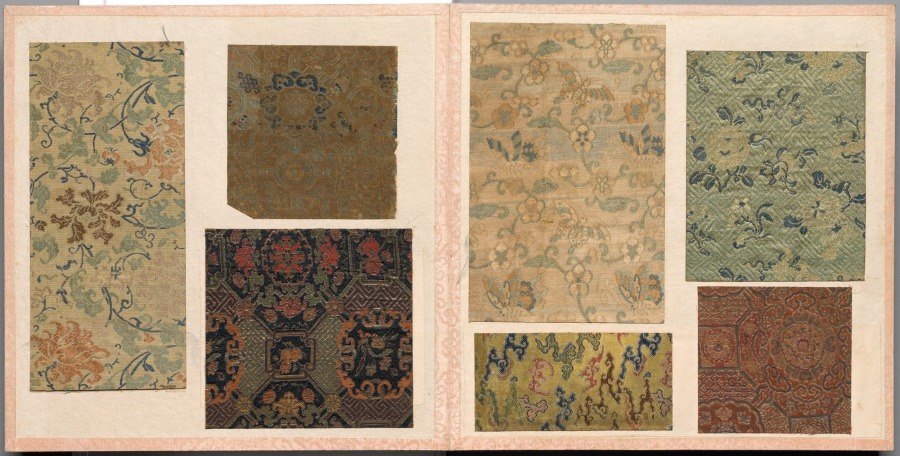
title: Album of Textile Samples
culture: Japan and China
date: 1700s–1800s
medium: silk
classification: Textile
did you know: This album contains 46 pages with 156 mounted Chinese or Japanese textile samples.